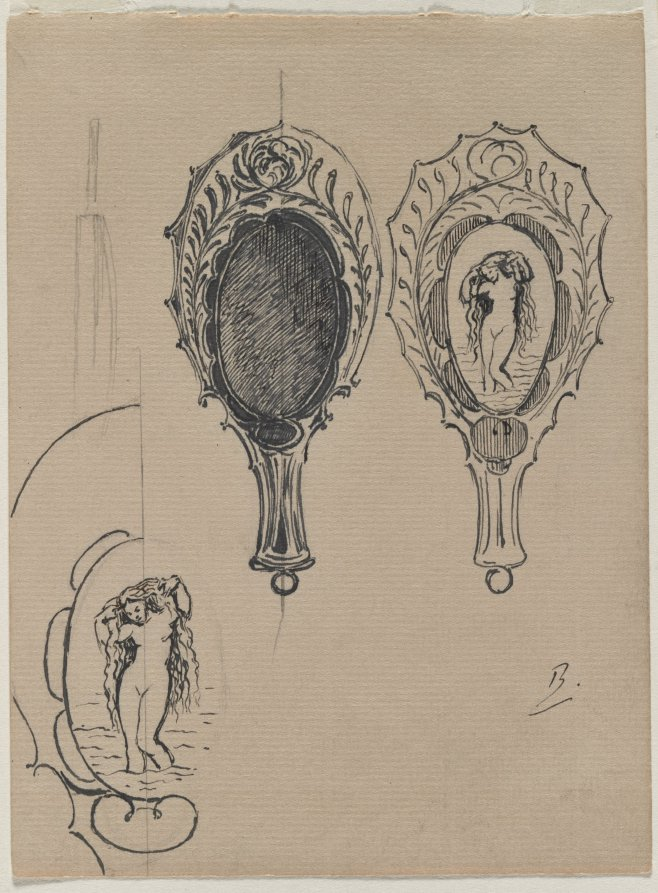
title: Design for a Hand Mirror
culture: France, 20th century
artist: Félix Bracquemond (French, 1833–1914)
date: c. 1900–1902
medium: pen and black ink with graphite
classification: Drawing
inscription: The window mat bears an inscription written in graphite pencil along the bottom edge: "ENCRE DE CHINE/ET/AQUARELLE/BRACQUEMOND (FELIX) - 1833 - 1914 PROJECTS DE MIROIR UTILISANT UN BAS RELIEF DE RODIN Rep_?_ Arts Decoration 1902 Tome XII p. 10 Pour le Baron Vita."